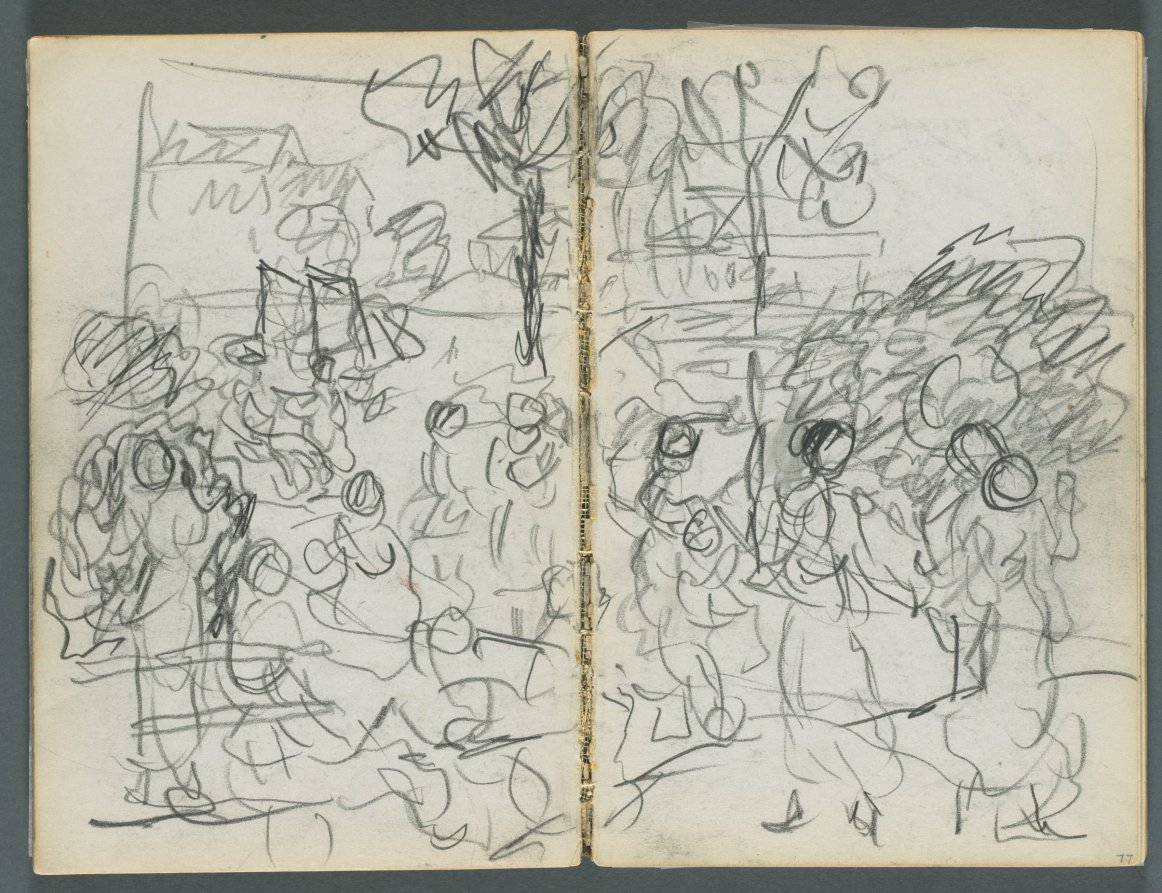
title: Sketchbook, The Dells, N° 127, page 076 & 77: Figures in a Landscape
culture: America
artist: Maurice Prendergast (American, born Newfoundland [now Canada], 1858–1924)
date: c. 1919–1921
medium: graphite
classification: Bound Volume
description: This sketchbook contains 59 pages of graphite drawings and 16 watercolors made at various locations on Cape Ann, Massachusetts.